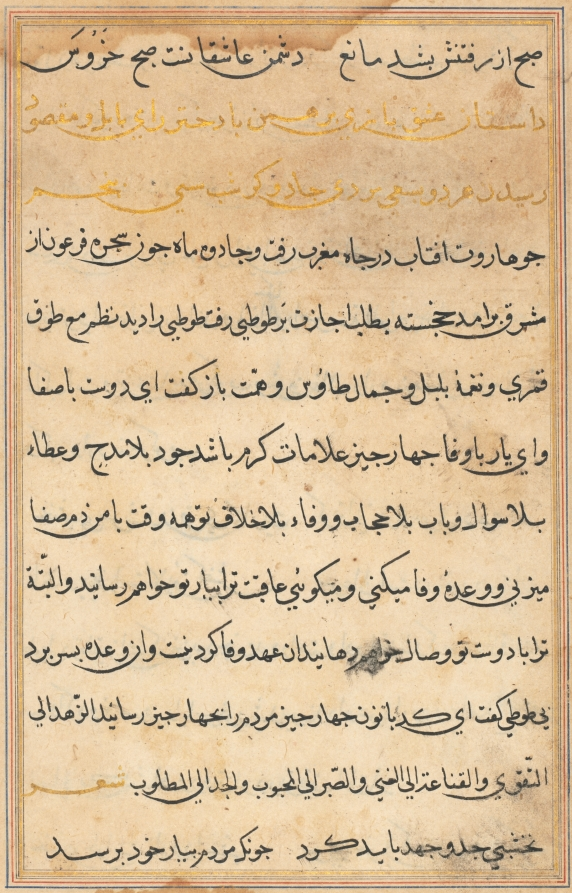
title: Page from Tales of a Parrot (Tuti-nama): text page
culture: Mughal India, court of Akbar (reigned 1556–1605)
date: c. 1560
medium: gum tempera, ink, and gold on paper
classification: Painting